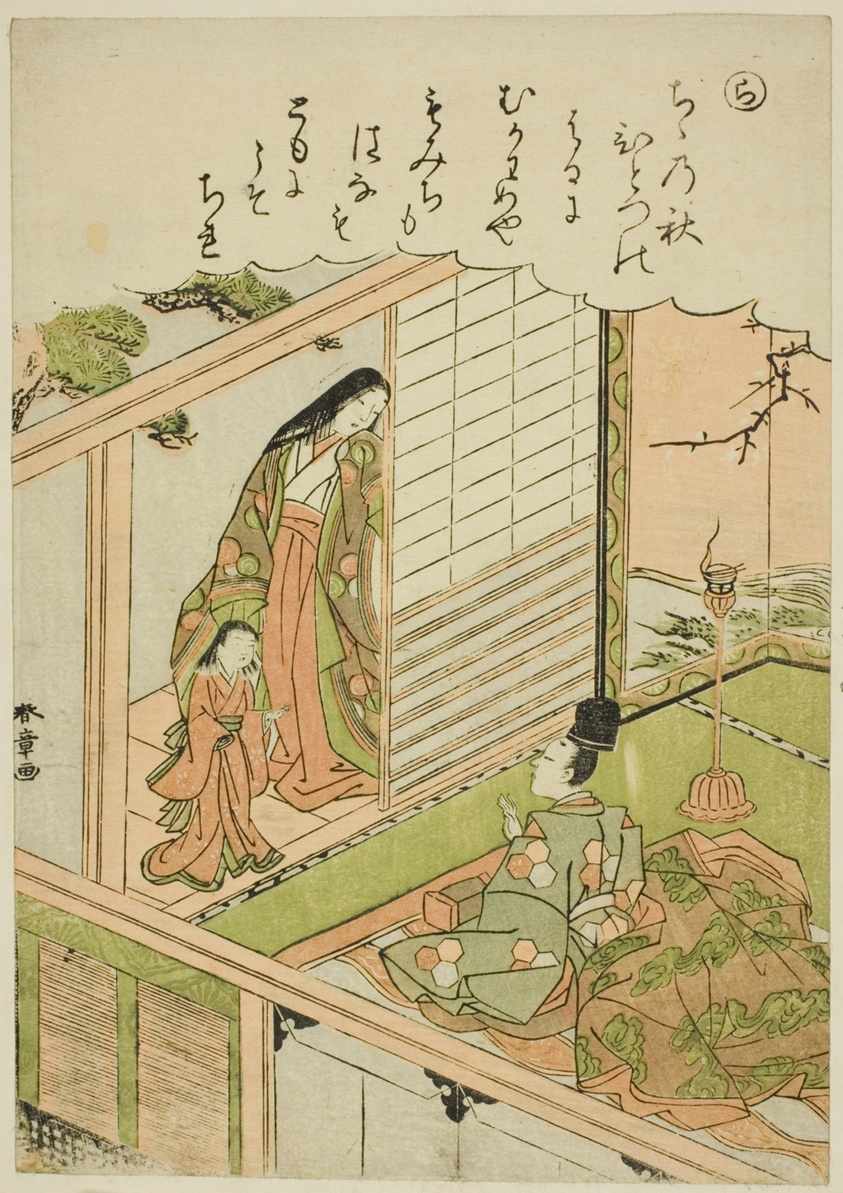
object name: Print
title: "Ra": Narihira Requests a Painting from a Former Lover, from the series "Tales of Ise in Fashionable Brocade Pictures (Furyu nishiki-e Ise monogatari)"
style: Japanese (culture or style)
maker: Katsukawa Shunsho 勝川 春章; Japanese, 1726-1792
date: c. 1772/73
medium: Color woodblock print; koban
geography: Japan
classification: woodblock print; print; asian art